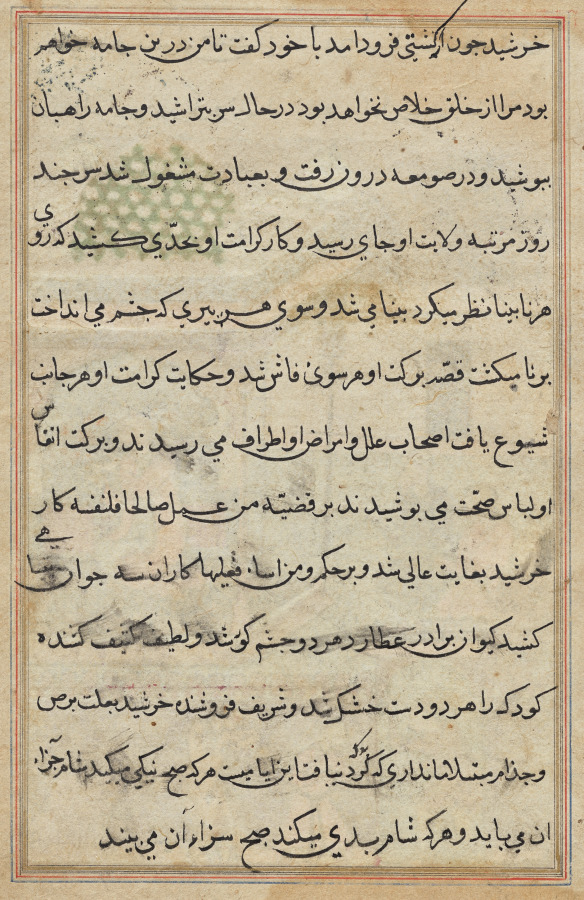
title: Page from Tales of a Parrot (Tuti-nama): text page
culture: Mughal India, court of Akbar (reigned 1556–1605)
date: c. 1560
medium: gum tempera, ink, and gold on paper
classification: Painting